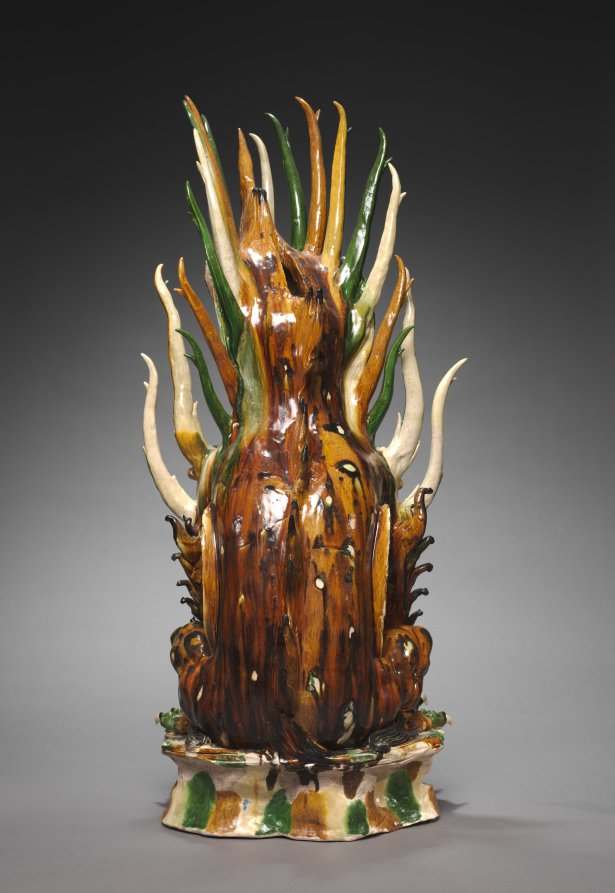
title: Tomb Guardian with Animal Head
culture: China, probably Shaanxi province, Xi'an, Tang dynasty (618-907)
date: early 700s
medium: glazed earthenware, sancai (three-color) ware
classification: Ceramic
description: With their fierce expressions and exaggerated physical features, fantastic guardian creatures were intended to guard the entrance to a tomb, warding off evil as well as keeping the soul of the deceased from wandering. Known as "earth spirits" or qitou, this one has an animal face and a pair of antlers growing above its eyebrows; the other sports a human face with huge protruding ears and a short horn surrounded by fiery, twisting hair. Their many elongated spikes heighten the fearful intensity. Before tomb sculptures were placed in the tomb, they were carried through the streets in a funerary procession. Funerary gifts provided the deceased with means for the afterlife. They were also an expression of filial piety and demonstrated the wealth and power of the descendants.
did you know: Sancai (three-color) glazes in green, amber, and transparent white, plus expensive cobalt blue glaze, show the high social status of the tomb’s occupant.